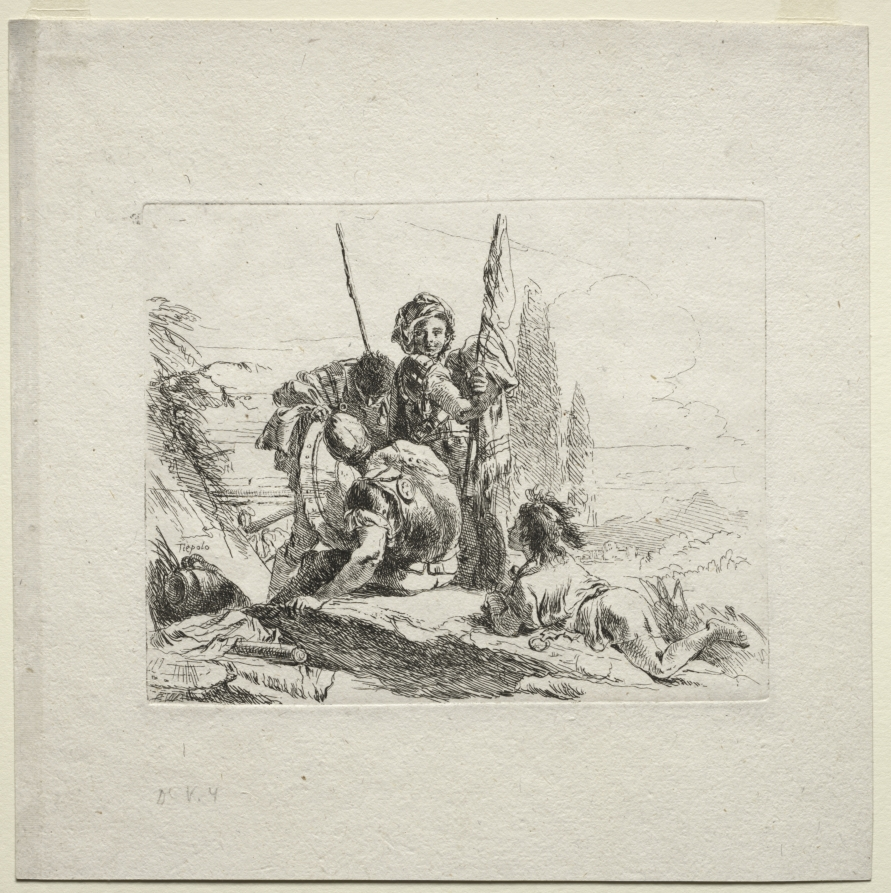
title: Various Caprices: The Three Soldiers and the Boy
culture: Italy, 18th century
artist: Giovanni Battista Tiepolo (Italian, 1696–1770)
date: 1735–50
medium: etching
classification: Print